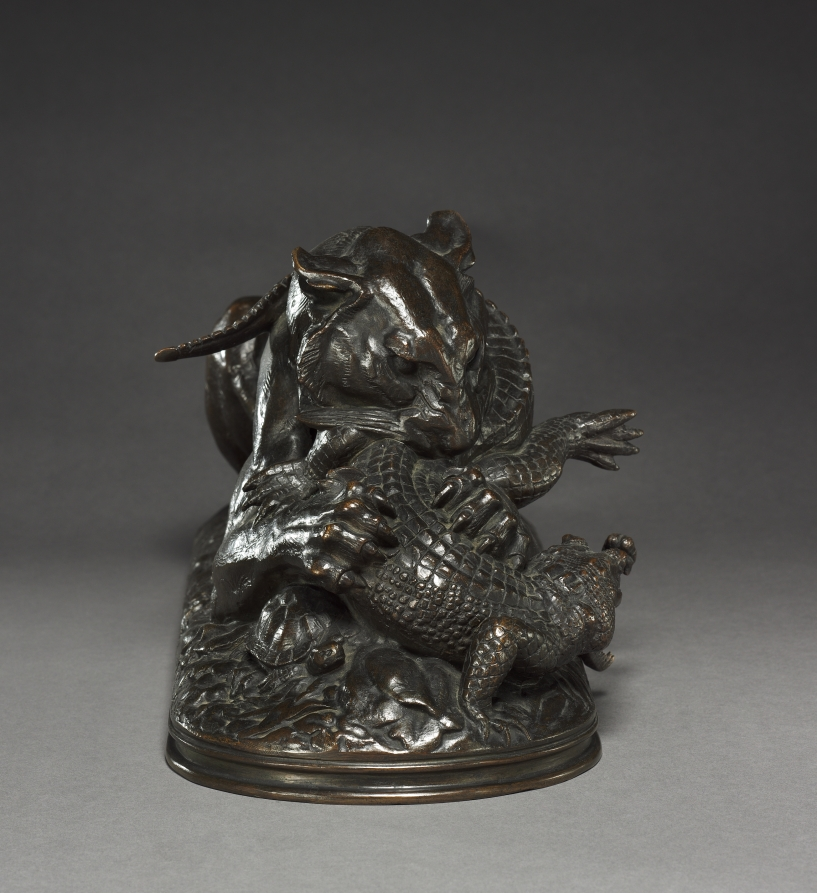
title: Tiger Devouring a Gavial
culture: France, 19th century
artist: Antoine-Louis Barye (French, 1796–1875)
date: 1831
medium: bronze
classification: Sculpture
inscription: Signed: "BARYE"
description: A large reptile of southern Asia, the gavial is related to and resembles a crocodile.